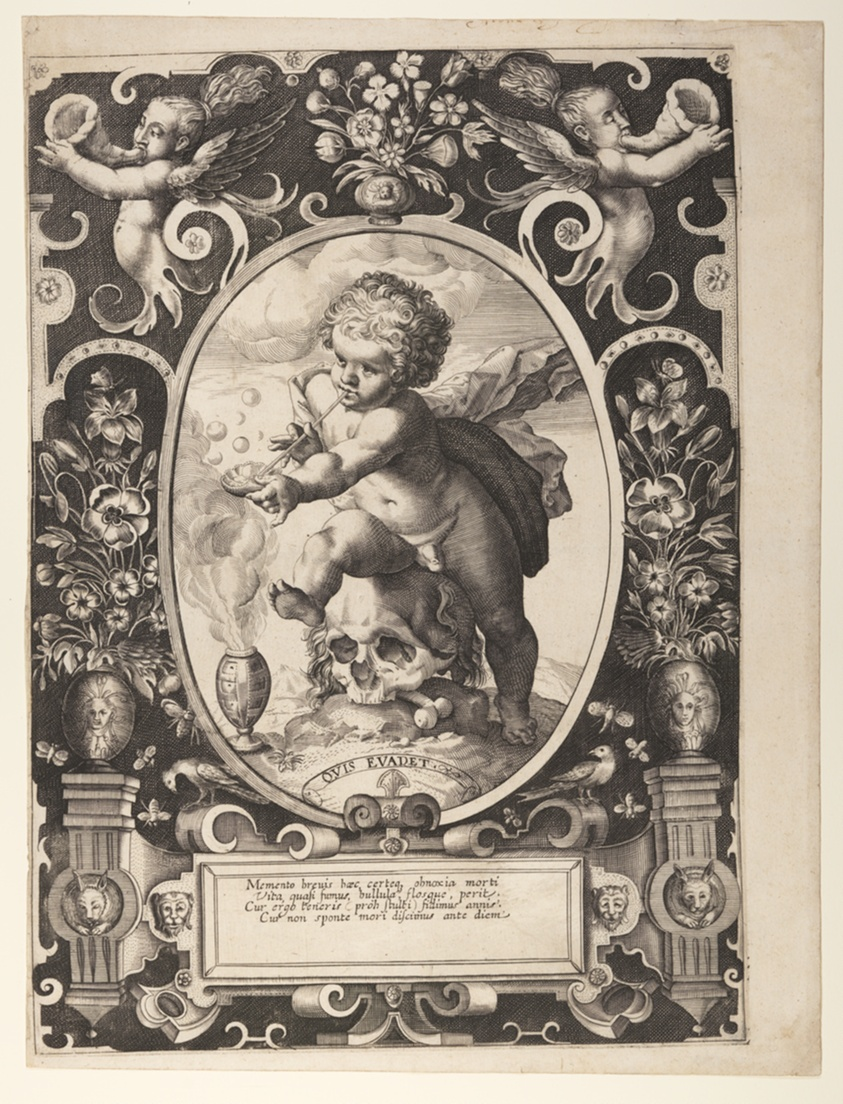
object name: Print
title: Allegory of Transience (Quis Evadet?)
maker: Workshop of Hendrick Goltzius; Dutch, 1558–1617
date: c. 1600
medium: Engraving on ivory laid paper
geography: Netherlands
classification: engraving; paper; print; prints and drawing